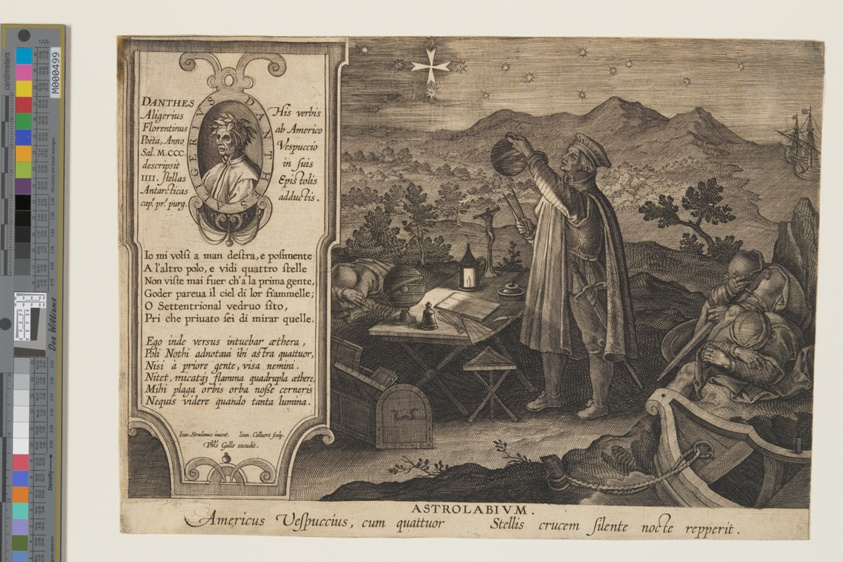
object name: Print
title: The Astrolabe - Amerigo Vespucci, from Nova Reperta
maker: Hans Collaert (Flemish, 1566–1628); after Jan van der Straet (Flemish, 1523–1605)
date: c. 1580-1600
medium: Engraving on ivory laid paper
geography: Flanders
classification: print; paper; prints and drawing; engraving